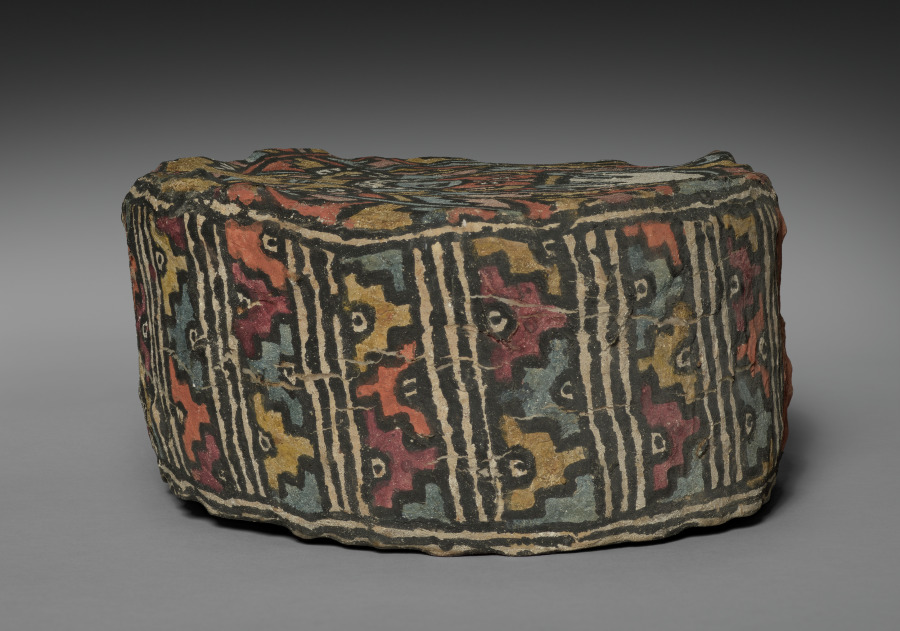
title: Painted Drum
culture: Central Andes, Middle Horizon, North Coast?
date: 500–1000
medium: Animal hide, gesso, wooden slats, pigment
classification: Musical Instrument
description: In the 1600s, music was so important to Indigenous Andean ceremonial life that Spaniards destroyed thousands of musical instruments to hasten Natives’ conversion to Christianity. The number of surviving, older instruments suggests that music had similar import in earlier periods. This rare example is painted with a figure wearing a crescent headdress, an emblem of status; it may have been played by a woman.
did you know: This painted drum may have been played by a woman in antiquity.